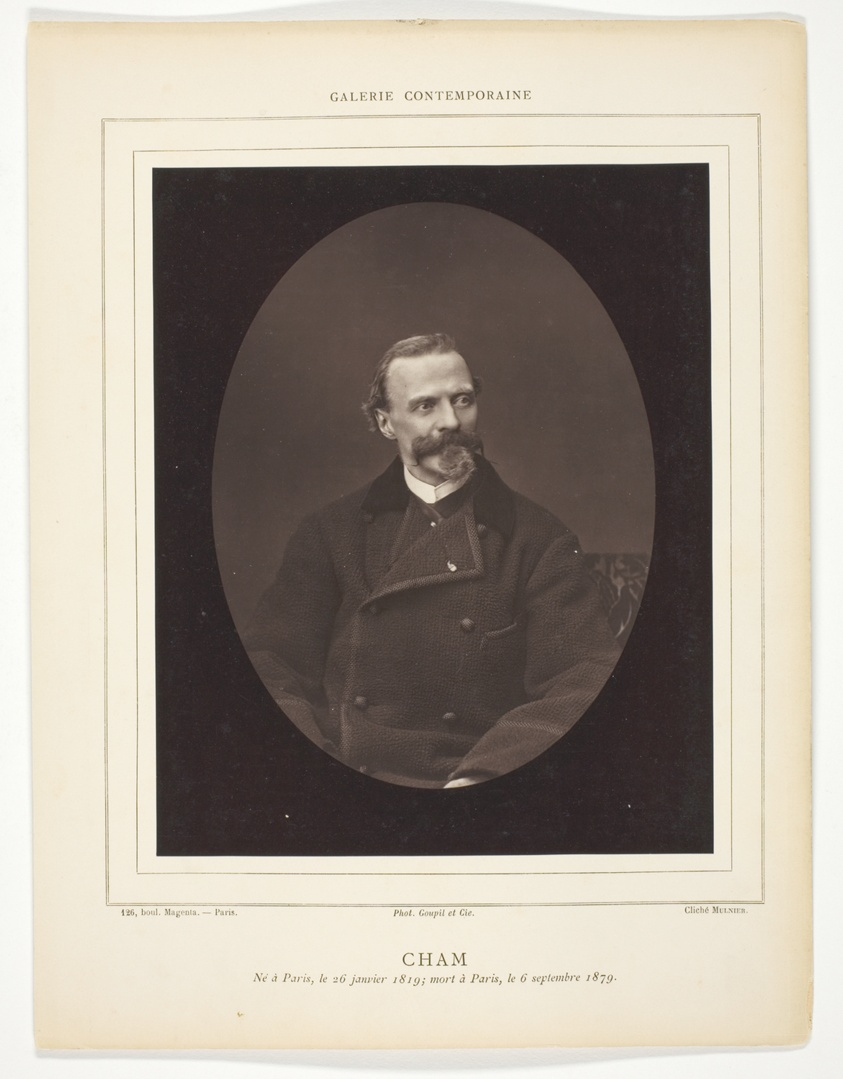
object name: Photograph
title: Cham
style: 19th century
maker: Ferdinand J. Mulnier (French, active 1860–1890)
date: c. 1876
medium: Woodburytype, from the periodical “Galerie Contemporaine Littéraire, Artistique” (1879), volume 8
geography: France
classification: woodburytype; photomechanical process; photography; photograph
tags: Collected by Hugh Edwards, Paris, Contemporaine Littéraire